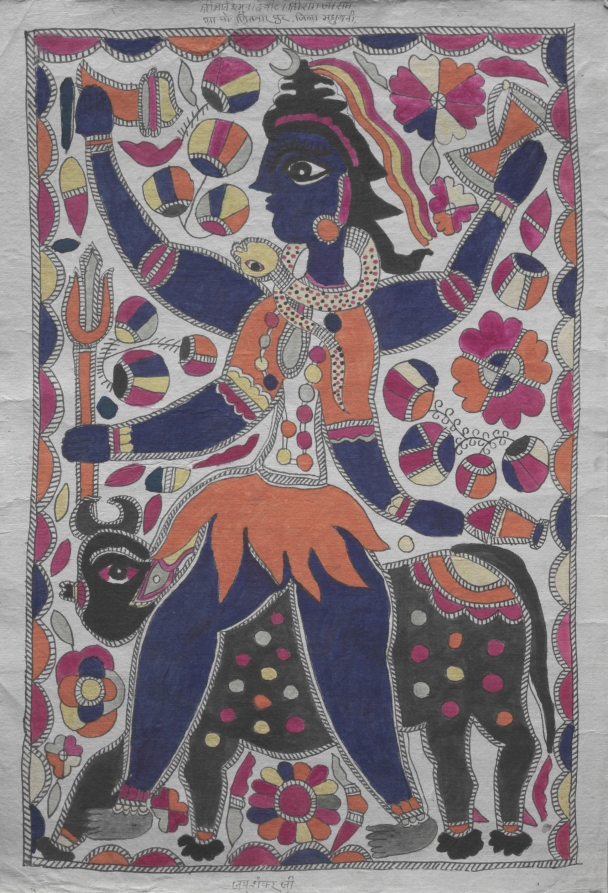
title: Shiva and Nandi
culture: Eastern India, Bihar State, Mithila or Madhubani School, 20th century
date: 1900s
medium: ink and color on paper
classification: Painting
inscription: [[lower center]] jaya shankar-ji